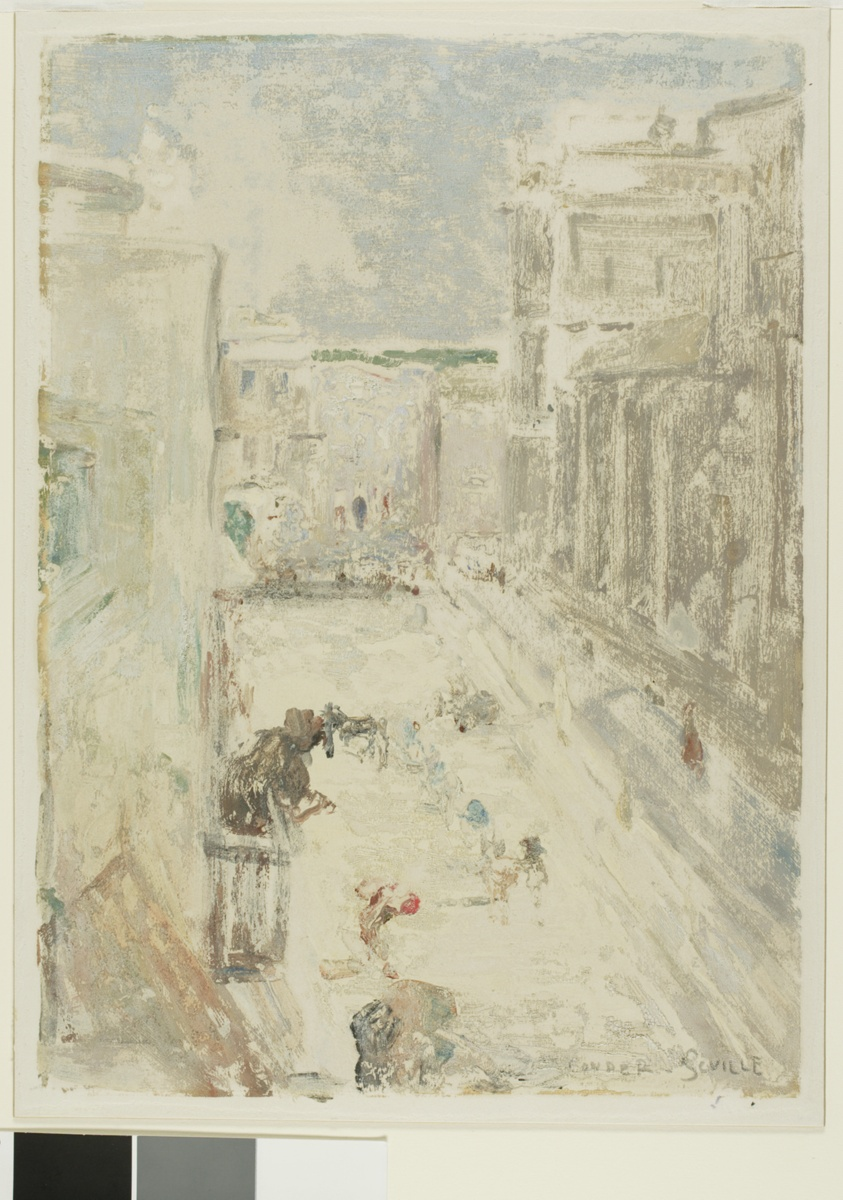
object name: Drawing and Watercolor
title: Street in Seville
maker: Charles Conder (English, 1868-1909)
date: 1905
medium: Gouache and oil on paper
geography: England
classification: monotype; prints and drawing; paper; drawings (visual works)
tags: Century of Progress, world's fairs, Chicago World's Fairs